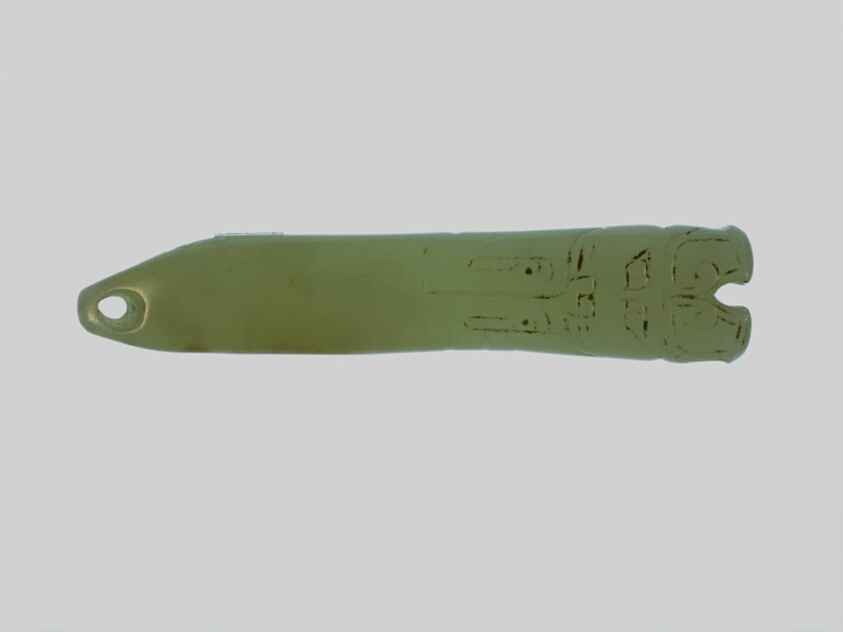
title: Pendant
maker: China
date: Shang (1600-1050BCE)/Early Western Zhou Dynasty (1045-771BCE)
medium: Jade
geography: China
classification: jade; asian art